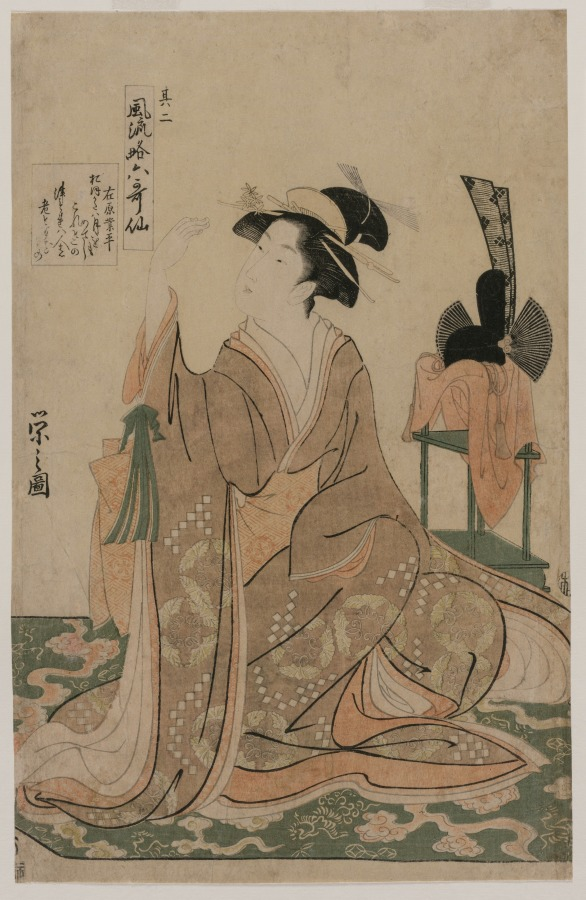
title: Young Woman Kneeling by a Stand with a Ceremonial Cap (from the series The Six Immortal Poets in Elegant Modern Dress)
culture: Japan, Edo period (1615–1868)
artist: Chōbunsai Eishi (Japanese, 1756–1829)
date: mid 1790s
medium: color woodblock print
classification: Print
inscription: Signature: Eishi zu Seal: kiwame